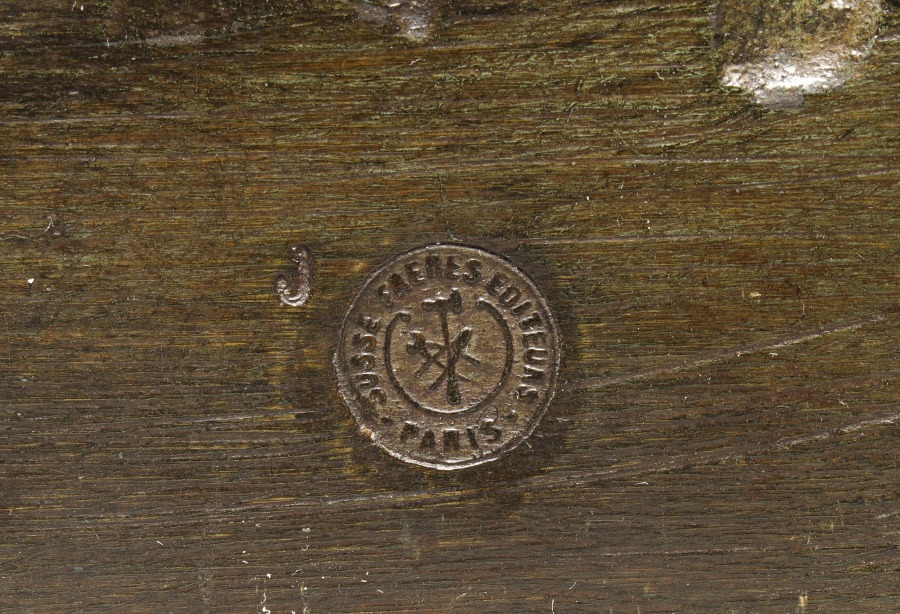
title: St. Joan of Arc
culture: France, 19th century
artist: Princesse Marie-Christine d' Orleans (French, 1813–1839)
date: 1836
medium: bronze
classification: Sculpture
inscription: Signed on top of base: "Marie d'Orléans."; inscribed on left side of base: "Susse Fres Edts Paris."